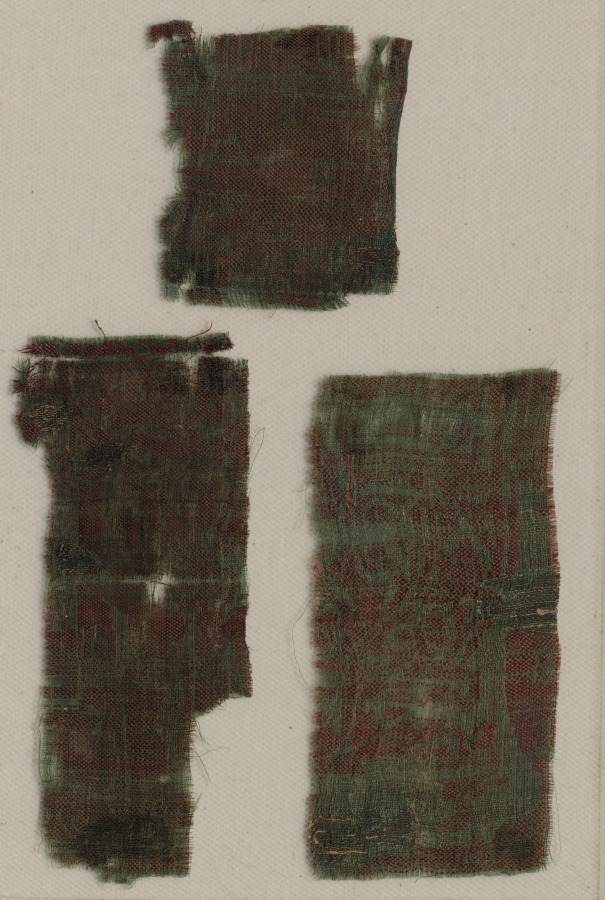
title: Three Fragments of Italian Gothic Silk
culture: Italy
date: 1300s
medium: lampas weave, brocaded; silk and gold thread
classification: Textile